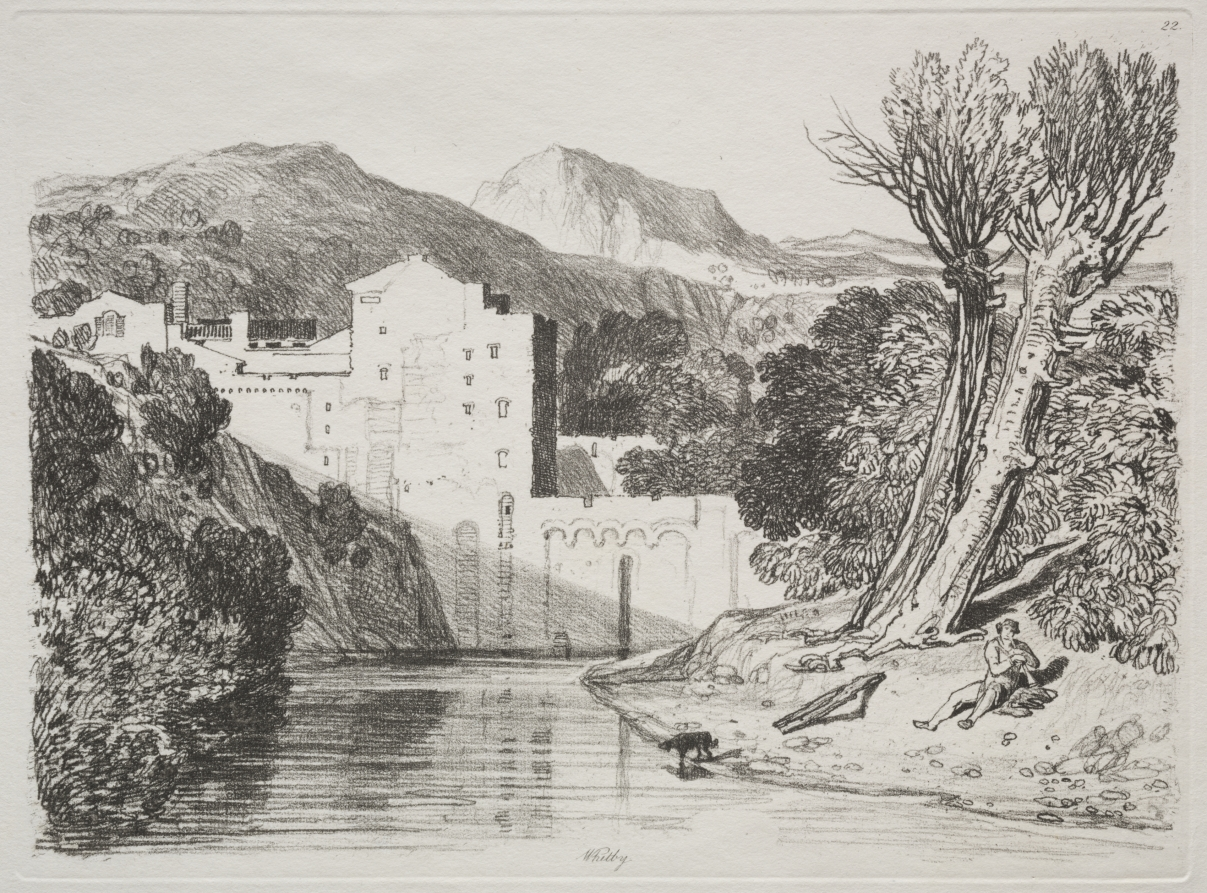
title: Whitby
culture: England, 19th century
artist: John Sell Cotman (British, 1782–1842)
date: c. 1824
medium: etching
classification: Print